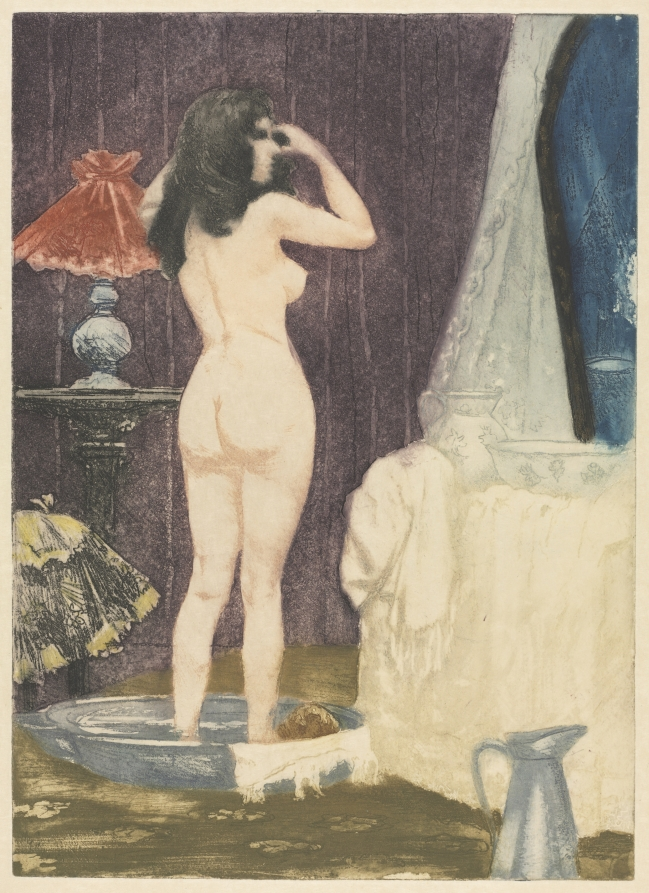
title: The Dressing Room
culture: France, 19th century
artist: Charles Maurin (French, 1856–1914)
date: 1898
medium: etching and aquatint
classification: Print